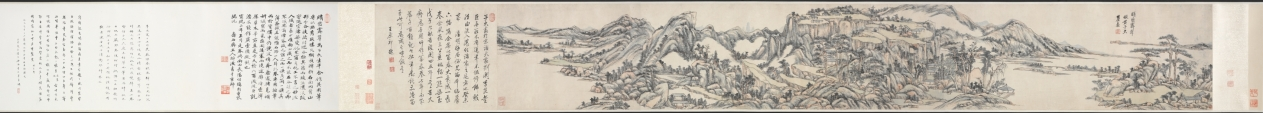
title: Green Peaks under Clear Sky: After Huang Gongwang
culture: China, Qing dynasty (1644-1911)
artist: Wang Yuanqi (Chinese, 1642–1715)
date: 1703–8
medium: handscroll; ink and light color on paper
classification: Painting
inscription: 晴巒霽翠：倣黃子久。麓臺。[印]石師道人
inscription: [印] 御書畫圖留與人看. 子久畫於宋諸大家荊、關、李、范、董、巨，無所不有。運筆不假修飾。皴法由淡入濃，化諸家之迹者也。澹明徐君偶見縮本，臨摹六幅。囑余參以富春大意，成一長卷。余夙夜在公，乘暇偶一點染。至戊子九秋告竣，閱四、五年矣。昔大癡為無用師作富春卷，七年而成，為千古鉅觀。今拙筆癡鈍。亦淹留至此。可為識者噴飯矣。王原祁題。[印]王原祁印; 麓臺 [印, 畫芯左下] 西廬後人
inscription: 3 additional colophons and 15 additional seals: 1 colophon and 9 seals of Yang Shicong 楊士驄 (b. 1870); 1 colophon of Wu Hufan 吳湖帆 (1894–1968); 1 colophon and 1 seal of Wu Mei (20th c.); 5 seals of Cheng Qi 程琦 (1911–1988).